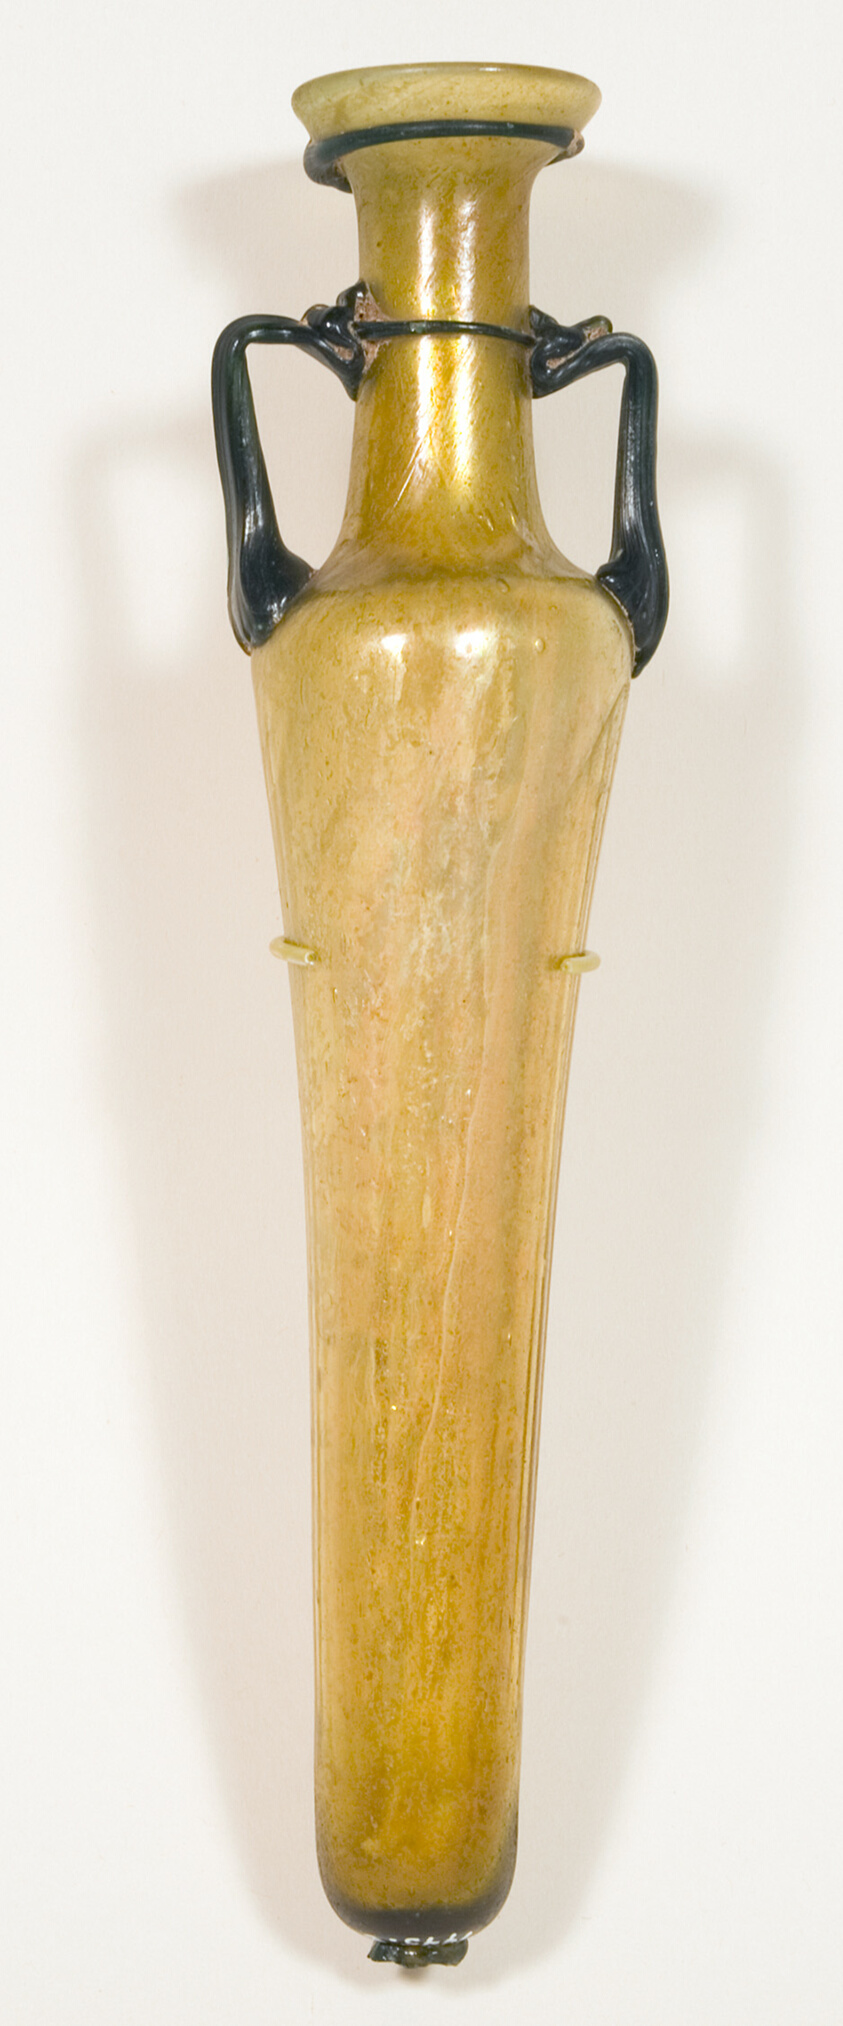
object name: Vessel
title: Double-Handled Flask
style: syrian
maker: Byzantine; Eastern Mediterranean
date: 4th-5th century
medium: Glass, blown technique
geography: Syria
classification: vessel; glass; ancient art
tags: vessels